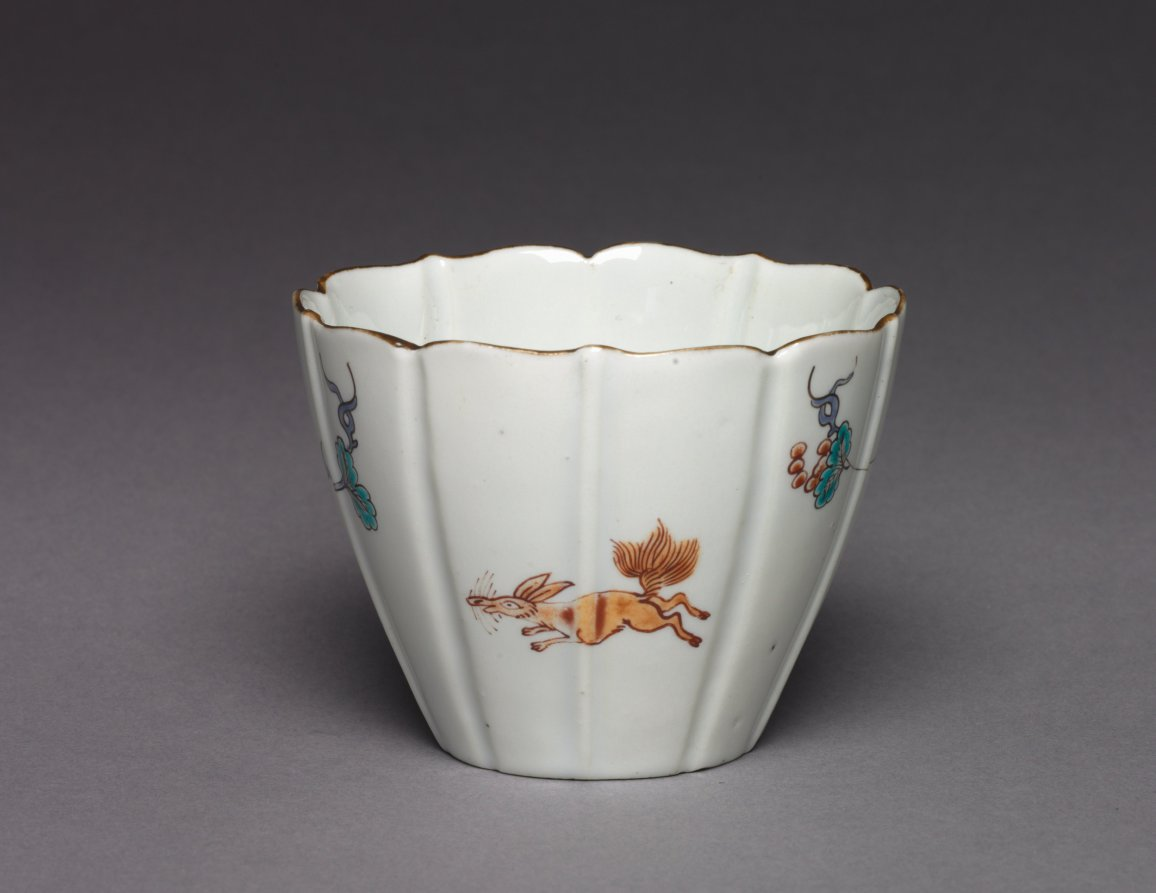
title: Tea Cup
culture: France, Chantilly, 18th century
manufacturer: Chantilly Porcelain Factory (French)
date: c. 1730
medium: soft-paste porcelain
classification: Ceramic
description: The pieces composing this individual tea set are entirely typical of Chantilly soft-paste porcelain in the Kakiemon style. Both the form and decoration of these pieces were inspired by Japanese prototypes. The use of knobs in the form of trumpet-shaped blossoms is characteristic of Chantilly wares.